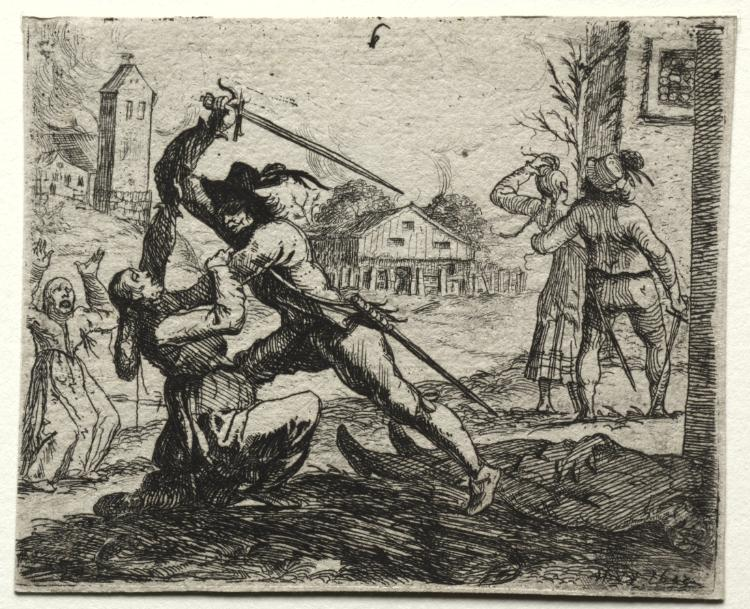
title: Military Subjects: Two Soldiers Pursuing Women in a Village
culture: Germany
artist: Hans Ulrich Franckh (German, 1603–1680)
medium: etching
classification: Print